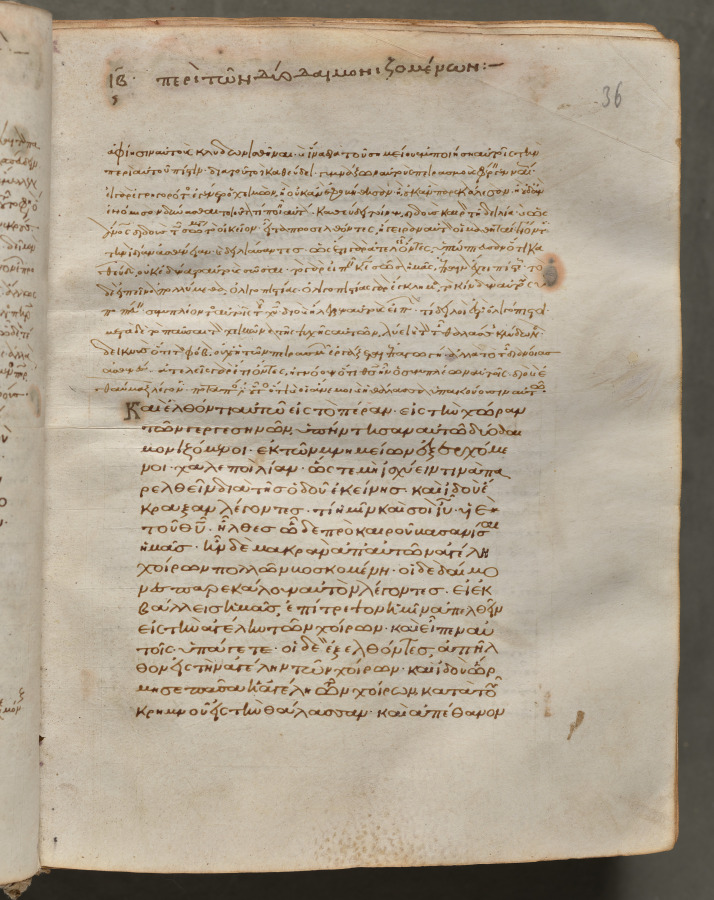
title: Text, folio 36 (recto), from a Gospel Book with Commentaries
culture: Byzantium, Constantinople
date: c. 1000–1100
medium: ink, tempera, and gold on vellum; leather binding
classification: Bound Volume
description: Each of the four gospels in this book opens on a page with brilliantly illuminated borders depicting the author of the text as well as birds—principally peacocks, symbols of the immortality of the soul—and fountains, representing the fountain of life and the salvation of the soul. This volume consists of 428 leaves with texts in Greek. Its level of sophistication suggests that it was probably written and decorated in a monastery in Constantinople.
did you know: Gospel Books were carried in procession through Byzantine churches.